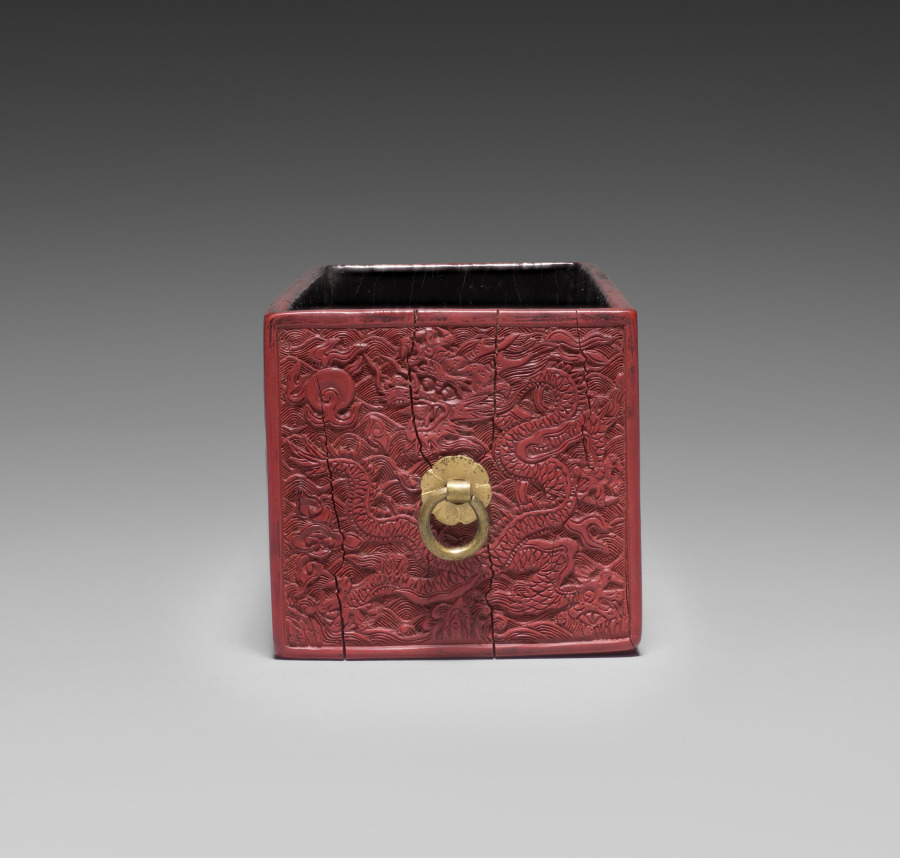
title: Drawer for a Tihong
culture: China, Ming dynasty (1368-1644), Wanli reign (1572-1620)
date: 1585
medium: carved cinnabar lacquer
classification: Lacquer